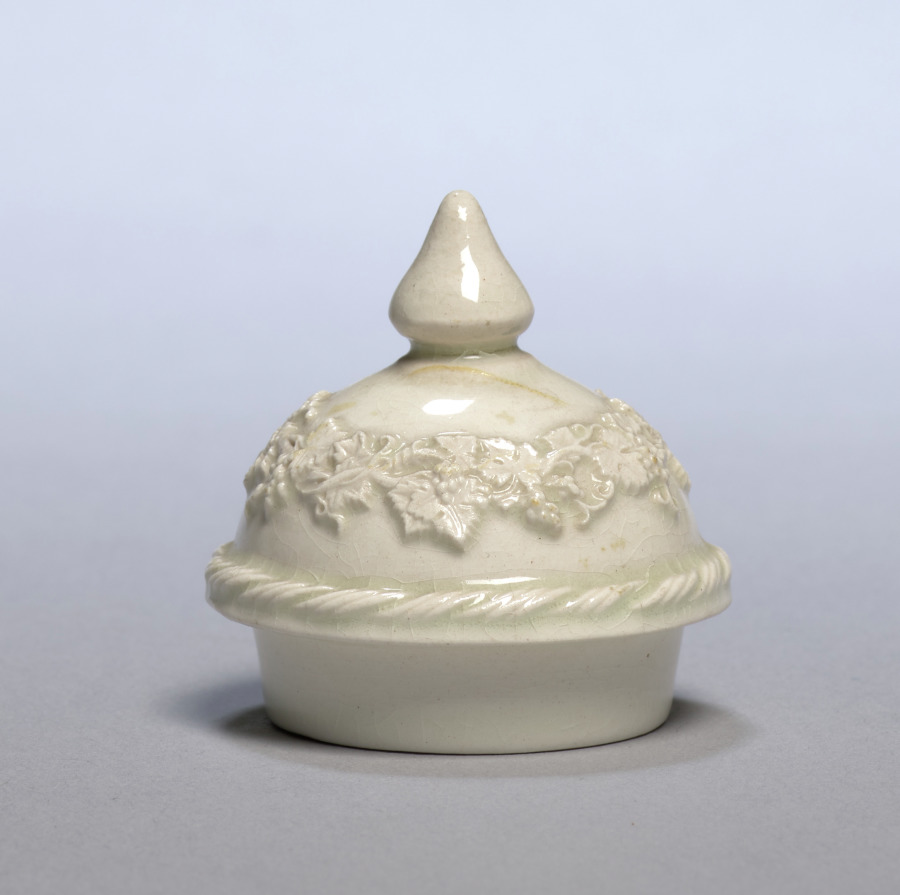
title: Teacaddy (lid)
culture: England, Staffordshire, 18th century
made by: Wedgwood Factory (British)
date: late 1700s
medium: cream-colored earthenware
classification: Ceramic